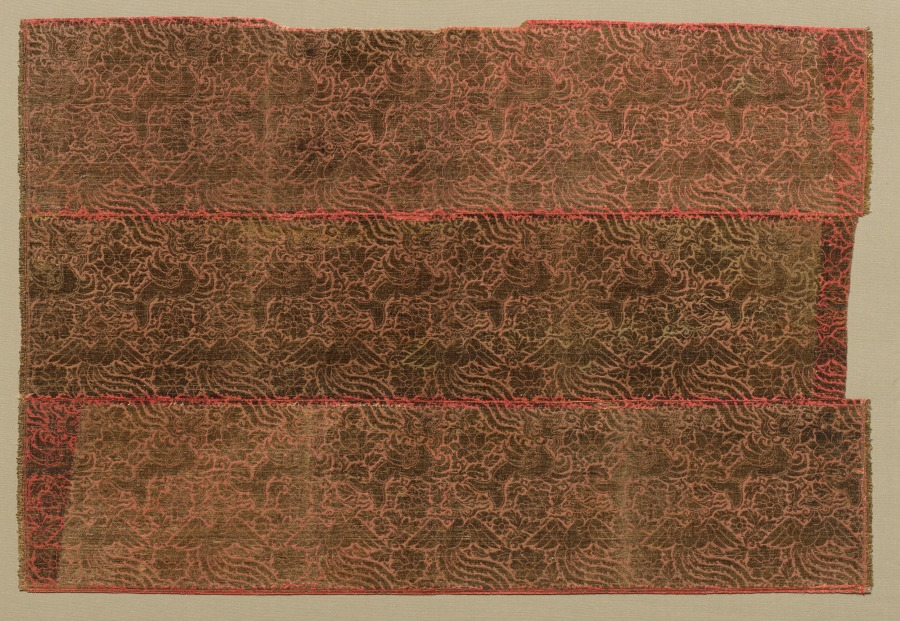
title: Makaras, Phoenixes and Flowers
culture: Central Asia or Daidu, 13th century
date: 1200s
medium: lampas, silk and gold thread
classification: Textile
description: Central Asian designers drew from a wide variety of motifs, both imaginary and real. In this silk, rows of soaring phoenixes alternate with rows of makaras. Combining a fish body and tail, wings, and a dragon's head, the makara originated in India as a water creature. With the spread of Buddhism, the motif migrated into the art of Central Asia and, from there, into the art of northern China. In Italy, exotic Central Asian patterns such as this inspired flights of imagination. One such example (seen in the photograph below) shows a creature, strikingly similar to the makara, spewing forth a dragon while a dog walks up its back.